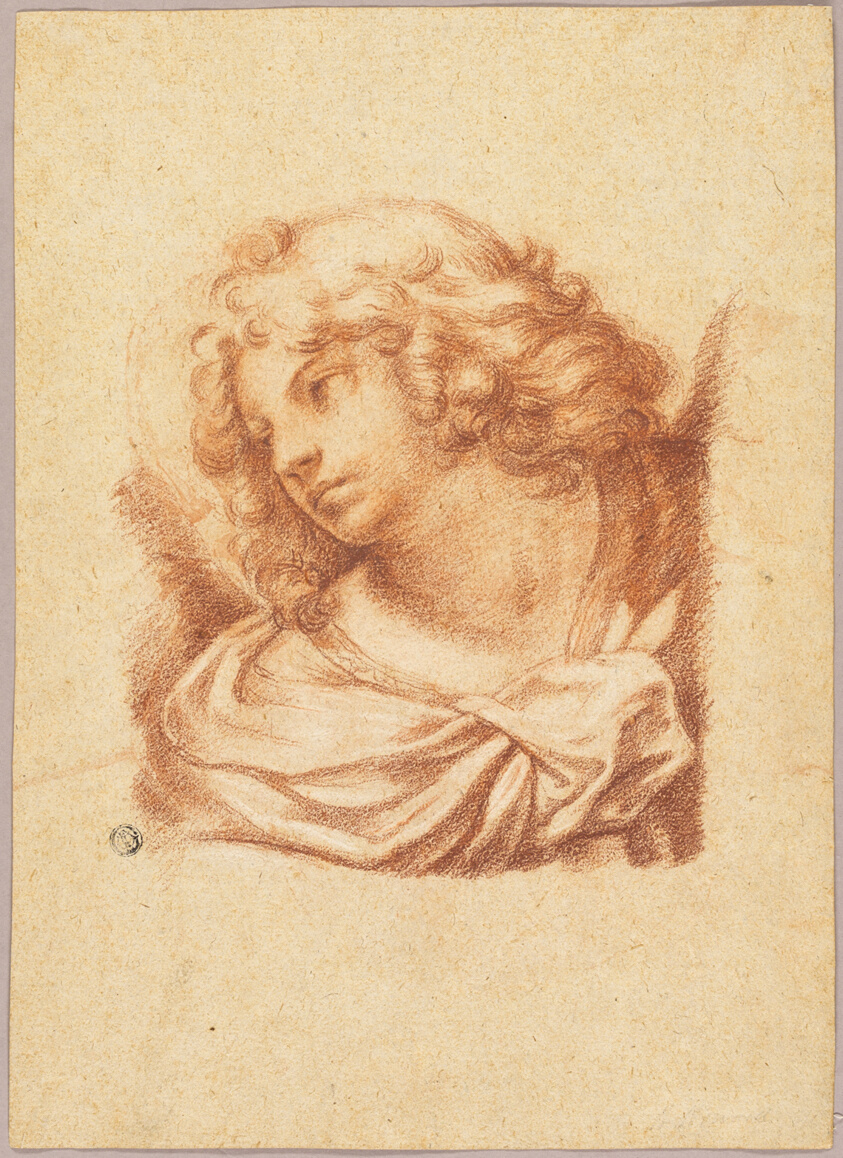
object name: Drawing and Watercolor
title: Angel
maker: Attributed to or possibly after Francesco Bartolozzi; Italian, 1727-1815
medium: Red chalk on tan laid paper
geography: Italy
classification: chalk; paper; drawings (visual works); prints and drawing